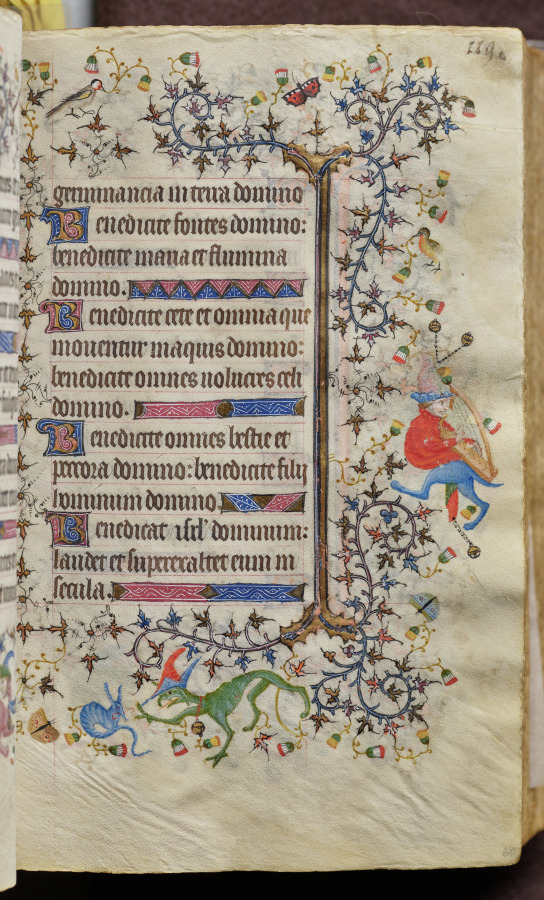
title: Hours of Charles the Noble, King of Navarre (1361-1425): fol. 60r, Text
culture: France, Paris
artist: Master of the Brussels Initials and Associates (French)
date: c. 1405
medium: ink, tempera, and gold on vellum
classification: Bound Volume